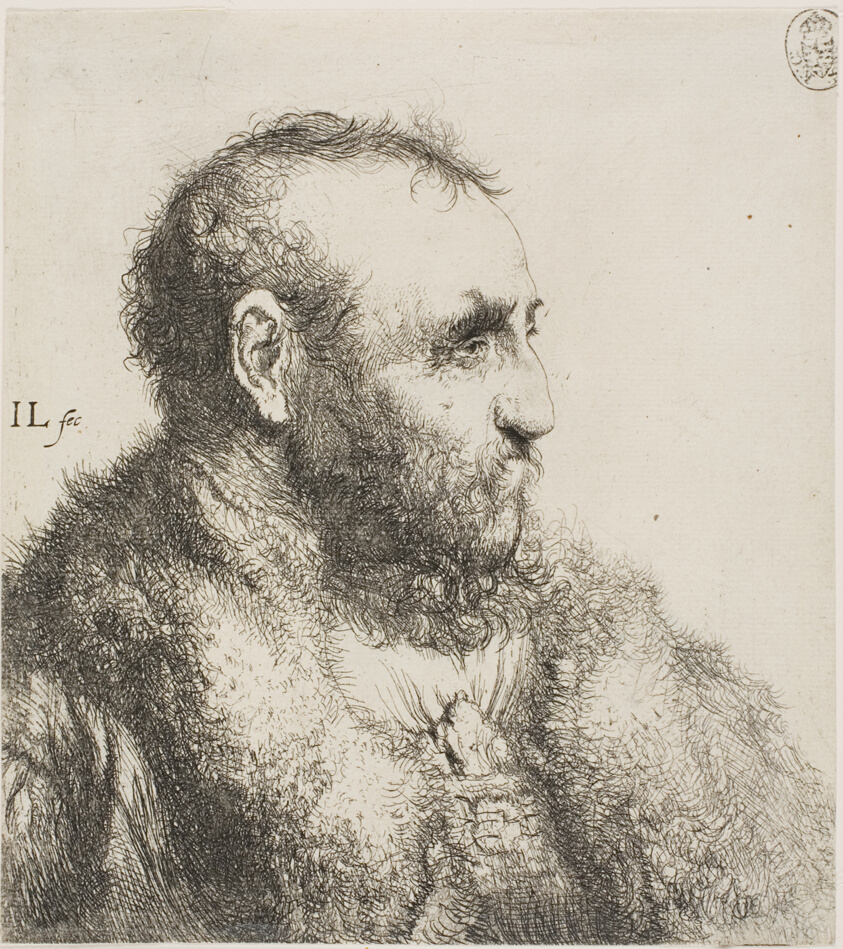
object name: Print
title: Bust of an Old Man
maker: Jan Lievens (Dutch, 1607-1674)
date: 1635–44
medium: Etching on paper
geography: Holland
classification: etching; print; prints and drawing